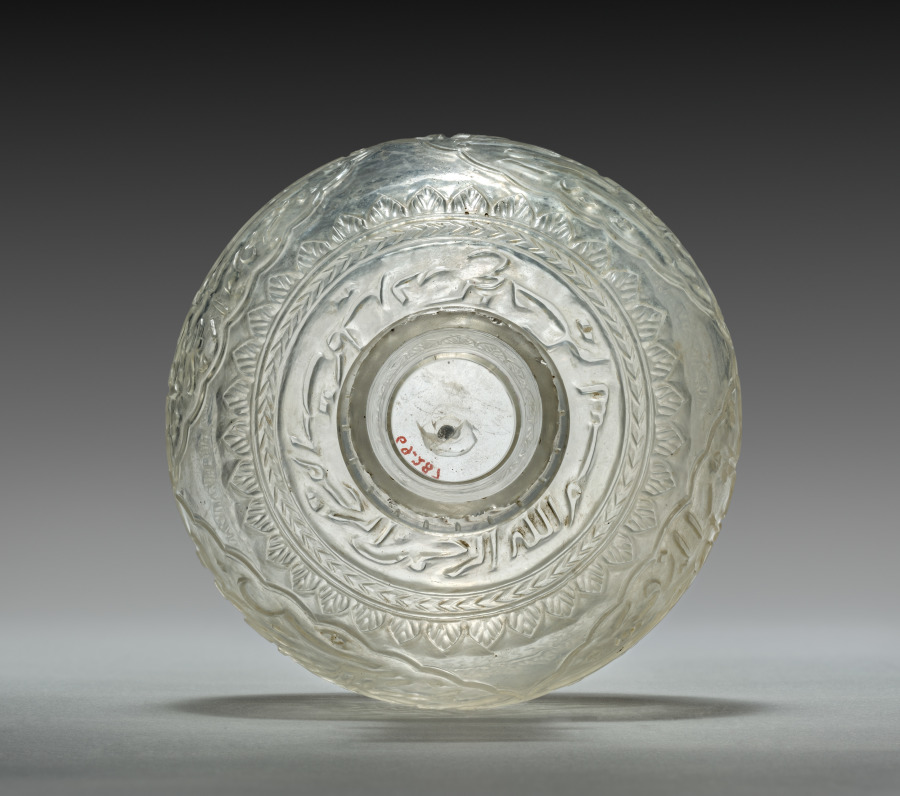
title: Hookah Bowl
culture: India, Mughal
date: 1700s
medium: glass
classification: Glass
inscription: Inscription in Farsi, on body: Even if live charcoal is placed on its head/ The hookah, a teacher of etiquette,/ will not respond unless drawn upon;/ Thus one can learn from its manners of refinement.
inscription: Inscription in Farsi, on shoulder: In the name of Allah the clement and merciful is the key to the wise treasure.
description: The inscription around the body of the base speaks to the use of the hookah in the decadent life of the Mughal court. The hookah is commended for being a proper, refined servant who will not “respond unless drawn upon” or, produce water bubbles when smoke is drawn through the hose. Undoubtedly the witty, poetic allusions would have been appreciated at banquets and other courtly gatherings. The use of wheel-cut glass for this hookah base may have been influenced by English glass and lead crystal that was exported to India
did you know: Around the top of this hookah bowl are incised the opening two lines from the Khamsa (Quintet) of the celebrated Persian poet Nizami (1141–1209).